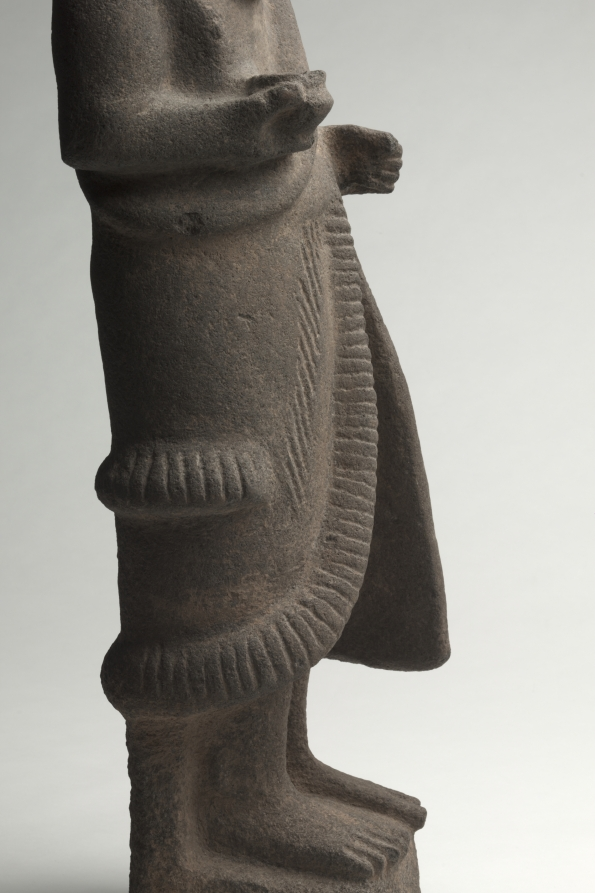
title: Priest-King or Deity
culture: Hittite, North Syria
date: c. 1600 BCE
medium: basalt with bone eyes (left, ancient; right, restored)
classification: Sculpture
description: The Hittites migrated into Anatolia in the 3rd millennium BCE and spoke an Indo-European language, a group that includes Greek, Latin, Persian, Sanskrit, English, and most modern European languages. They were the first ancient people to use iron for weapons. From about 1600–1200 BCE their empire was at its peak, extending from central Anatolia to Syria, and south along the eastern Mediterranean. Their vast empire and interest in commerce enabled the Hittites to spread Mesopotamian ideas and culture throughout the ancient Mediterranean world. This large basalt sculpture is exceptionally rare in depicting a Hittite god or priest-king wearing a horned conical crown, false beard, and long robe. He holds a bowl in his right hand and once held something in his left, perhaps a staff or sword.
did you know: The left eye of the sculpture is the original bone inlay while the right eye is a modern restoration done after the piece was damaged.